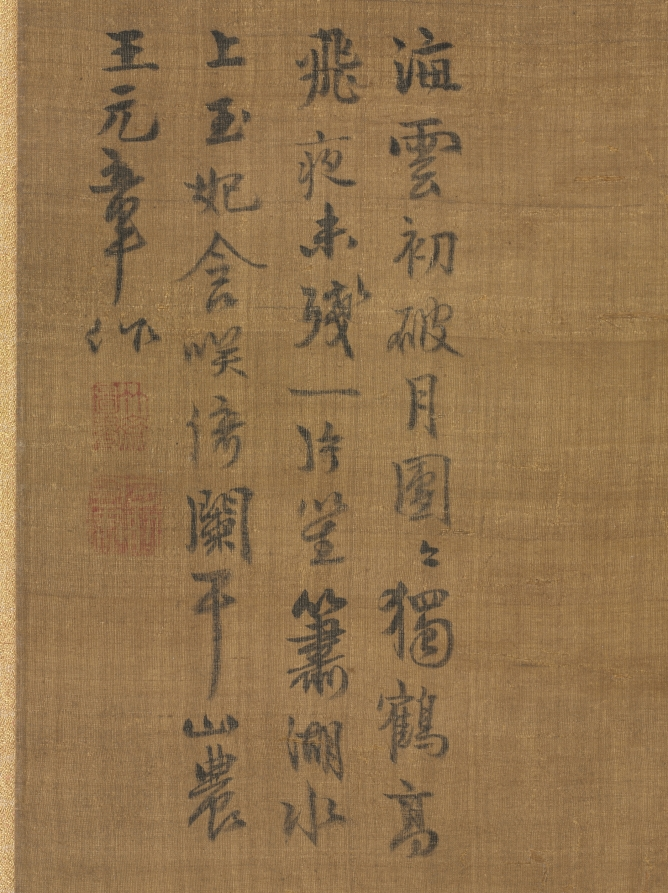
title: A Prunus in the Moonlight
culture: China, Yuan dynasty (1271-1368)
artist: Wang Mian (Chinese, 1287–1359)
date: 1300s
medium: Hanging scroll; ink on silk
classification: Painting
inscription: 8 additional seals: 6 of the Qianlong 乾隆 emperor (r. 1736-95); 2 of Dong Gao 董誥 (1740-1818).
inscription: 海雲初破月團團，獨鶴高飛夜未殘。/ 一片笙簫湖水上，玉妃含笑倚闌干。 王元章作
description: The plum flourishes in the mild climate of the south, and it was not before the Six Dynasties period (220– 589 CE) that the motif began to be appreciated by southern artists, many of whom had emigrated from the north. Wang Mian from Zhejiang province had failed the civil and military service examinations and later rejected appointments under the Mongol government. Instead, he chose to return home, making a living by selling plum paintings. Few of Wang’s works have survived, but they demonstrate that by his time the ink-plum (momei) genre was fully developed.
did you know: The painting portrays the plum in the nighttime, as indicated by the tint of the background and the presence of the moon.